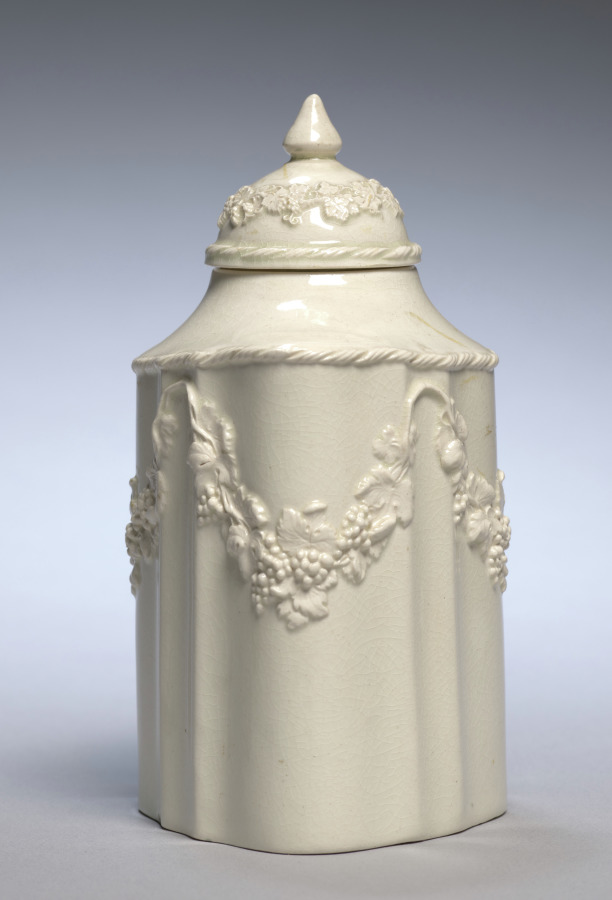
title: Teacaddy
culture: England, Staffordshire, 18th century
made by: Wedgwood Factory (British)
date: late 1700s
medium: cream-colored earthenware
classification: Ceramic